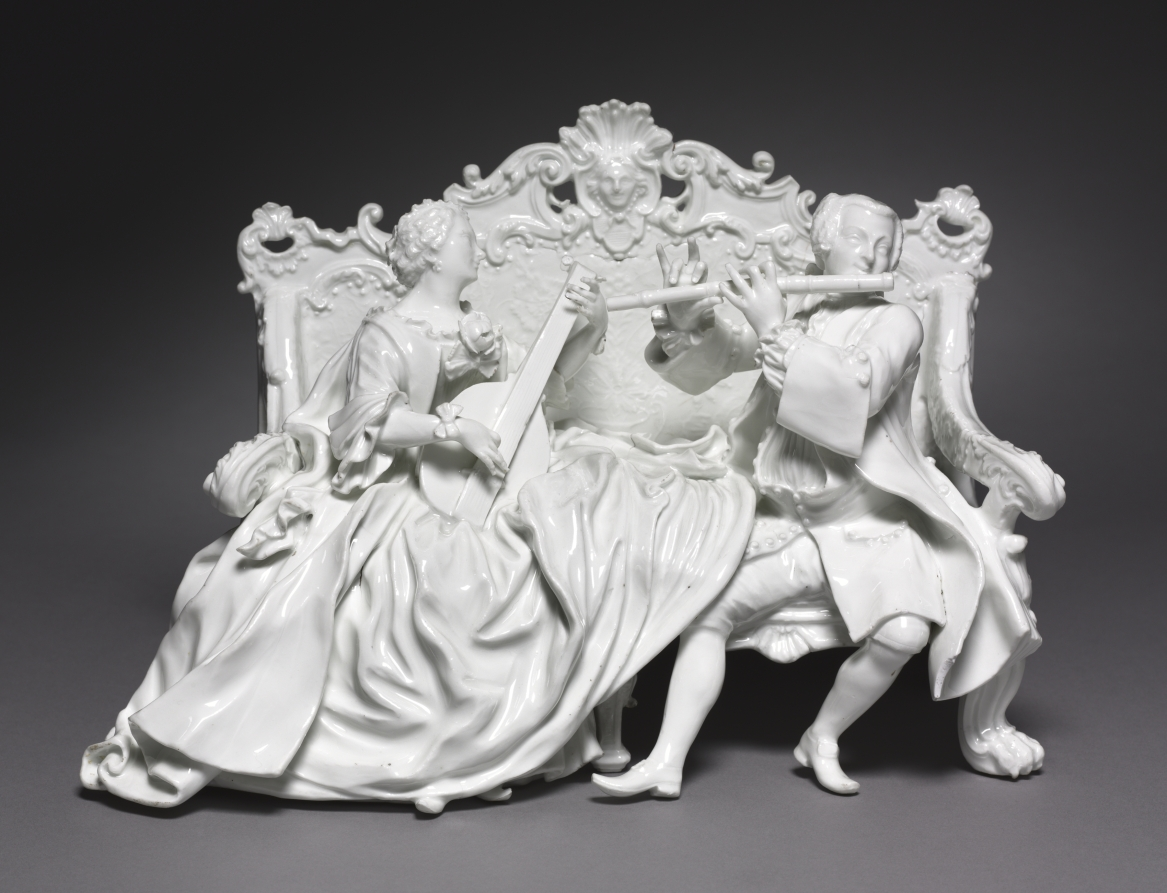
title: Figural Group: Musicians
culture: Germany, 18th century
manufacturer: Meissen Porcelain Factory (German, est. c. 1710)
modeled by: Johann Joachim Kändler (German, 1706–1768)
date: c. 1737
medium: porcelain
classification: Ceramic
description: An elegantly dressed couple accompany one another in a duet while seated on a tall-backed settee in this German porcelain figurine. The woman is likely playing a lute, an early form of the guitar, while the gentleman joins in with a wooden flute. Their music-making reflects their courtship and intimacy—a typical symbolic gesture rendered in such figural ceramic sculptures.